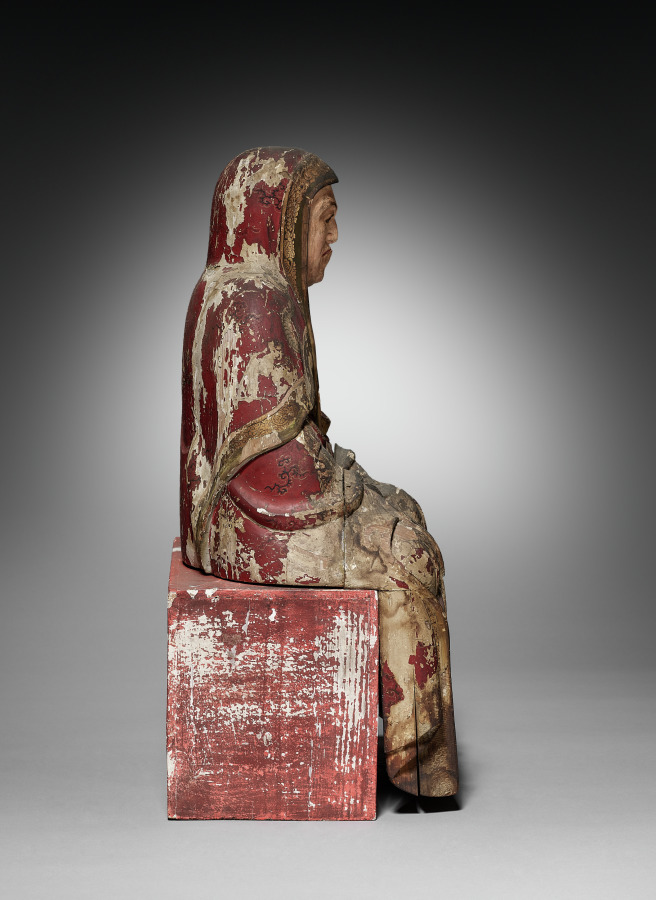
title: Rakan (Arhat) ?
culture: Japan, Edo period (1615–1868)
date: early to mid-1800s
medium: wood, gesso, pigment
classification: Wood